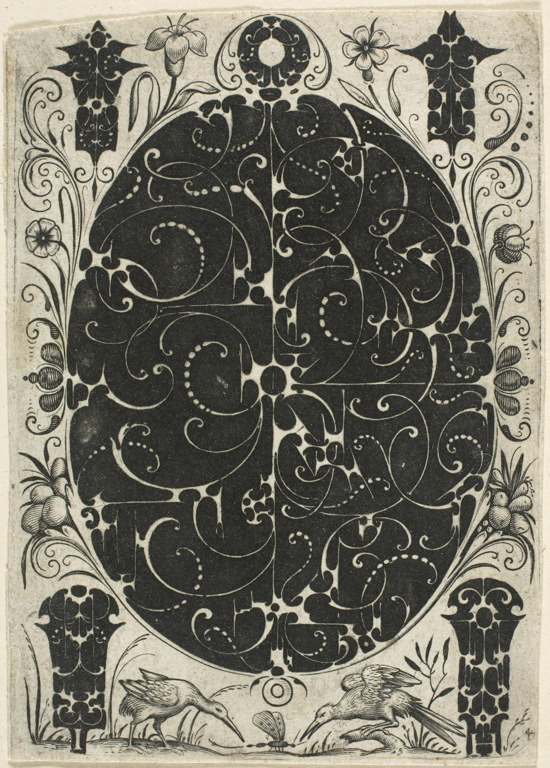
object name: Print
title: Ornamental Plate IV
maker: Jacques Hurtu (French, flourished 1614-19-died before 1623)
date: 1610/20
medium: Engraving on paper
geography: France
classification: engraving; print; prints and drawing